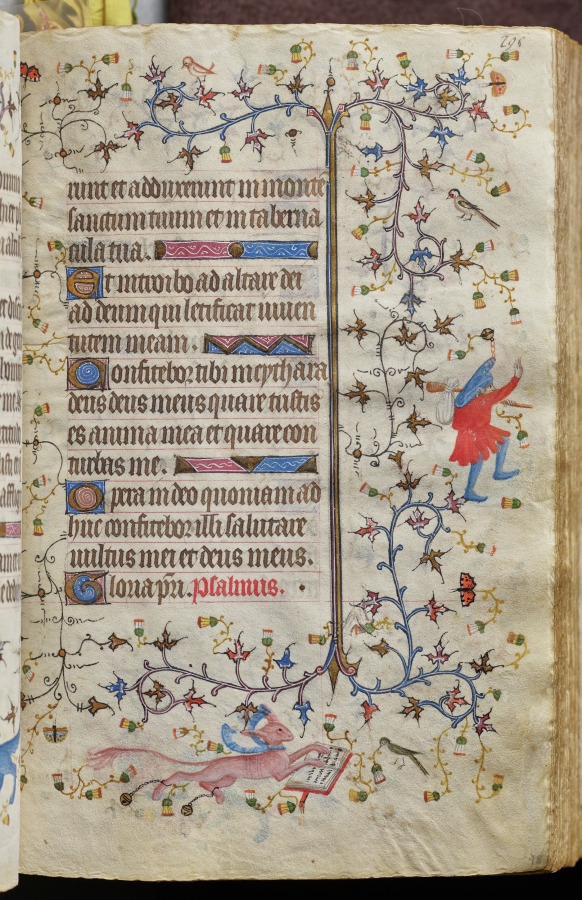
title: Hours of Charles the Noble, King of Navarre (1361-1425): fol. 98r, Text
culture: France, Paris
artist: Master of the Brussels Initials and Associates (French)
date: c. 1405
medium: ink, tempera, and gold on vellum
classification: Bound Volume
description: This precious volume was obviously highly prized by its owner, the French-born King of Navarre, who had his coat of arms painted on no less than twenty folios. Rather than directly commissioning this manuscript from a specific workshop, it seems that Charles the Noble acquired his book of hours -- perhaps ready-made for the luxury market -- while on a trip to Paris in 1404-05. A collaborative effort, six painting styles are evidenced within the pages of this codex, those of two Italians, two Frenchmen, and two Netherlanders. The painter who was responsible for the planning and decoration of the book, and who produced seventeen of the large miniatures, was a Bolognese artist known as the Master of the Brussels Initials. His principal assistant, responsible for most of the borders, was a Florentine who signed his name "Zecho" da Firenze on folio 208 verso.